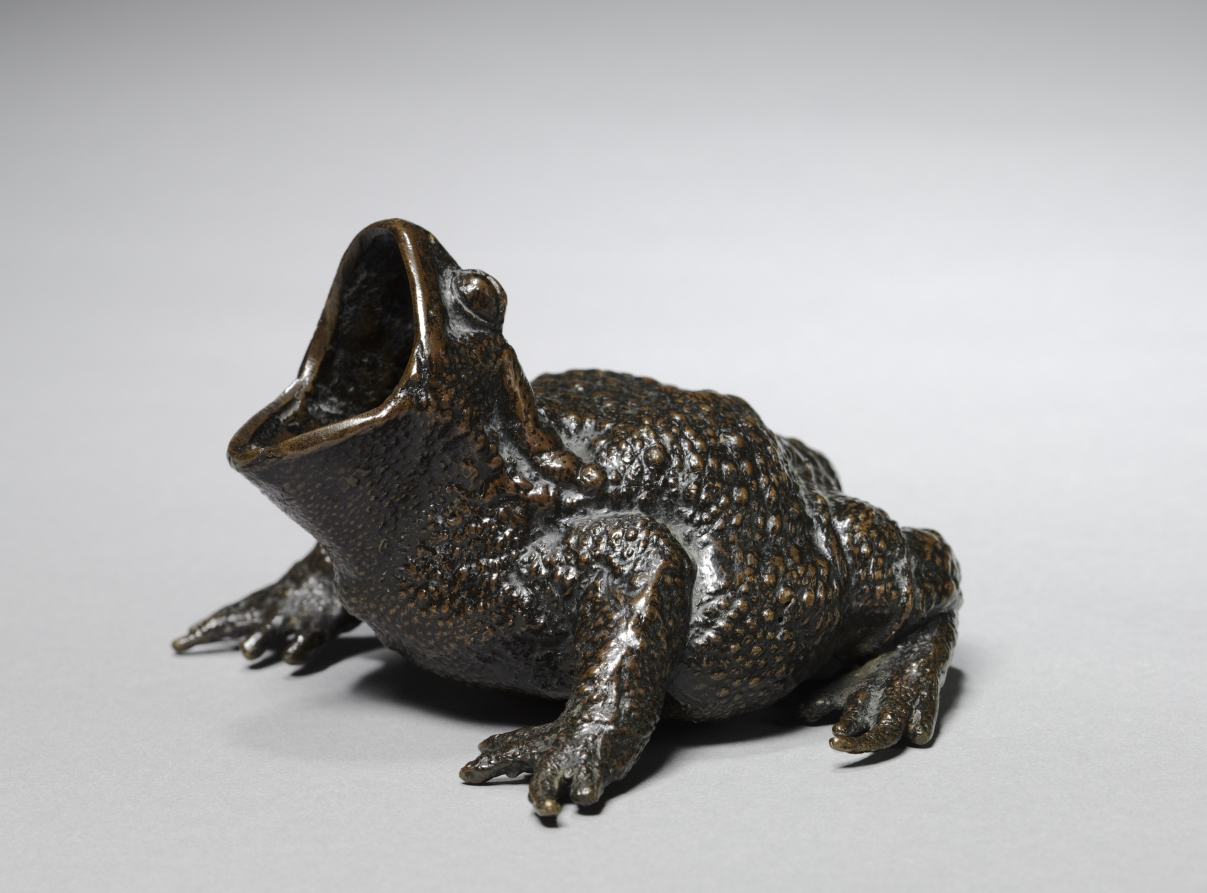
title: Toad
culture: Italy, possibly Padua, 16th century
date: c. 1500–1550 or later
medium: bronze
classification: Sculpture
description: Casting animals from life was a common Renaissance practice, connected to scholars’ interest in natural history and a taste for oddities. Drowning the toad in ammonia left the animal’s body intact. The workshop then manipulated the head, opened the mouth, and cast the creature as a functional object for the study.